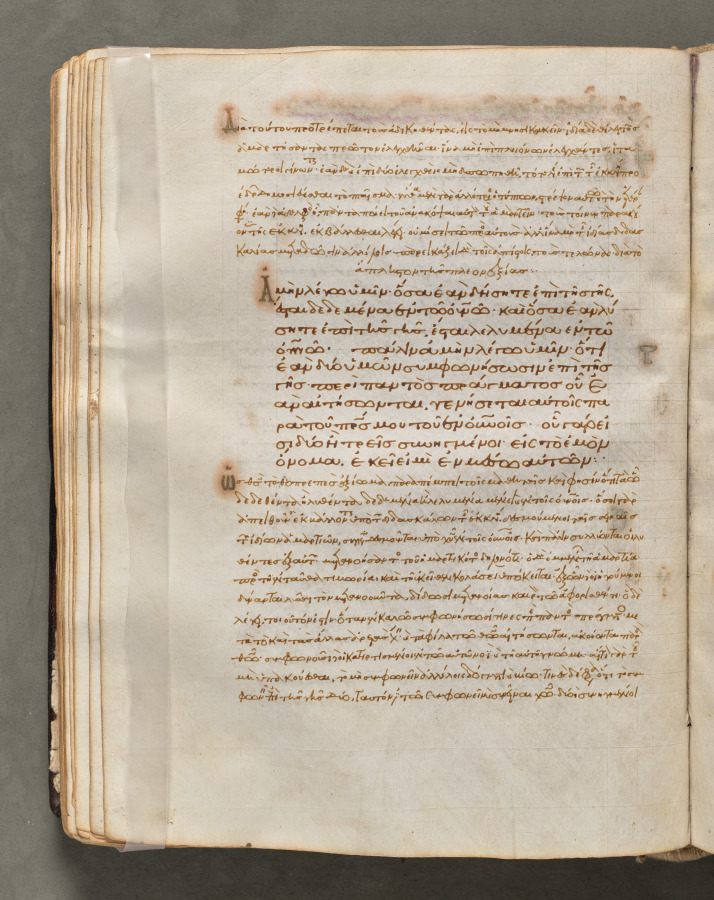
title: Text, folio 81 (verso), from a Gospel Book with Commentaries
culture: Byzantium, Constantinople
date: c. 1000–1100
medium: ink, tempera, and gold on vellum; leather binding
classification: Bound Volume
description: Each of the four gospels in this book opens on a page with brilliantly illuminated borders depicting the author of the text as well as birds-principally peacocks, symbols of the immortality of the soul-and fountains, representing the fountain of life and the salvation of the soul. This volume consists of 428 leaves with texts in Greek. Its level of sophistication suggests that it was probably written and decorated in a monastery in Constantinople.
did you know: Gospel Books were carried in procession through Byzantine churches.